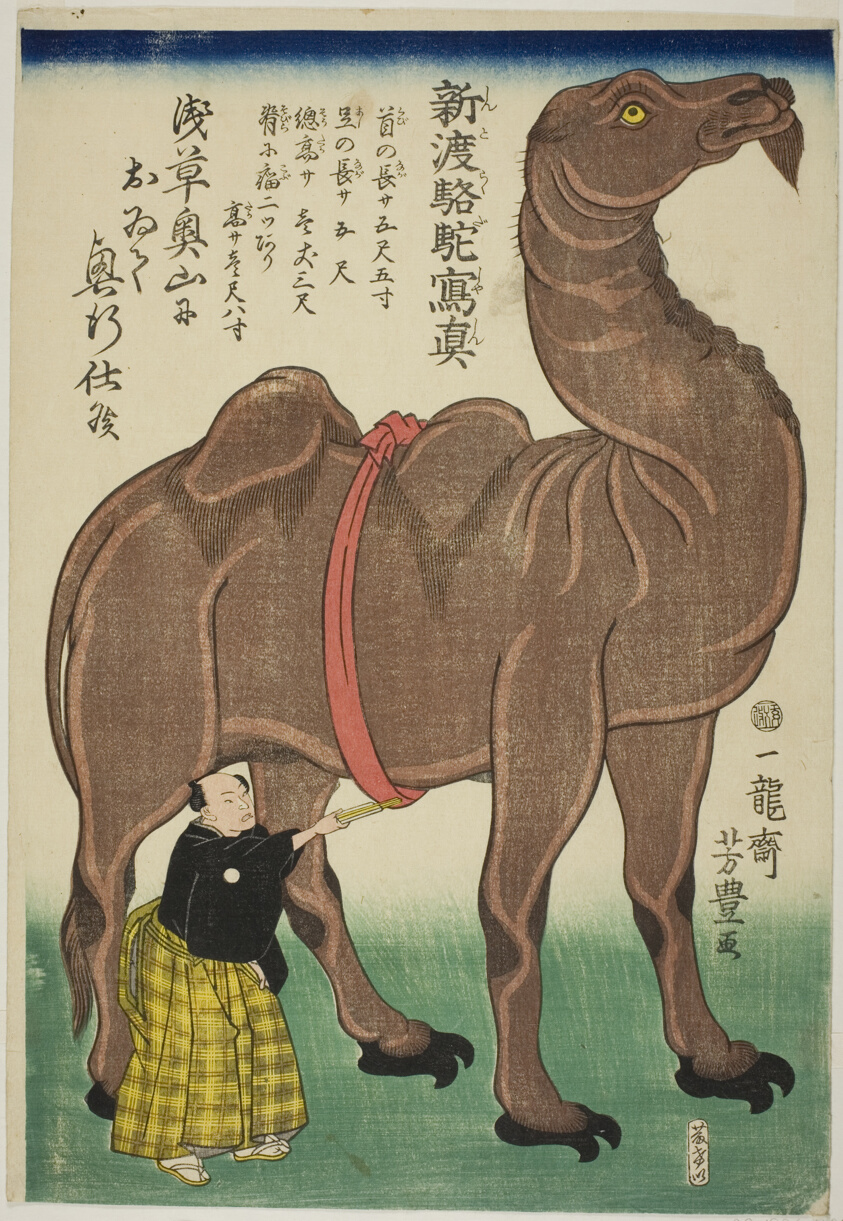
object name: Print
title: True Drawing of a Newly Arrived Camel (Shinto rakuda shashin)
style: Japanese (culture or style)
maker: Utagawa Yoshitoyo (Japanese, 1830–1866)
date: 1863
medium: Color woodblock print; oban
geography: Japan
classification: woodblock print; print; asian art